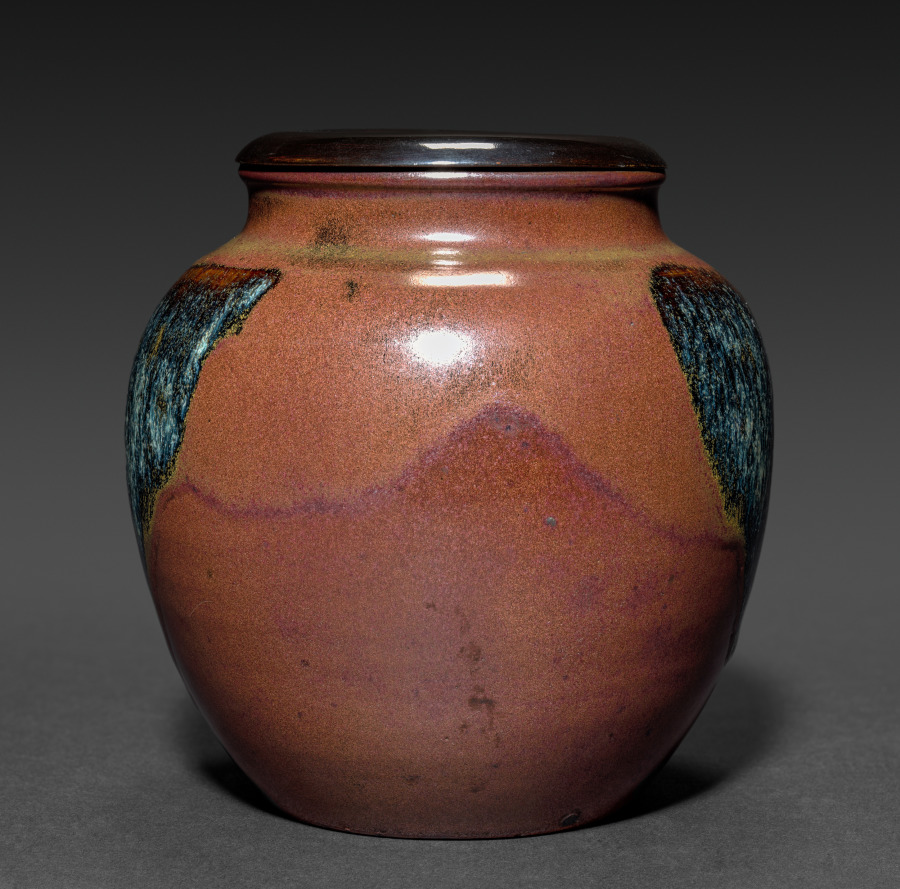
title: Jar with Wooden Cover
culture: Japan, Edo period (1615–1868)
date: 1700s-1800s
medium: pottery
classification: Ceramic